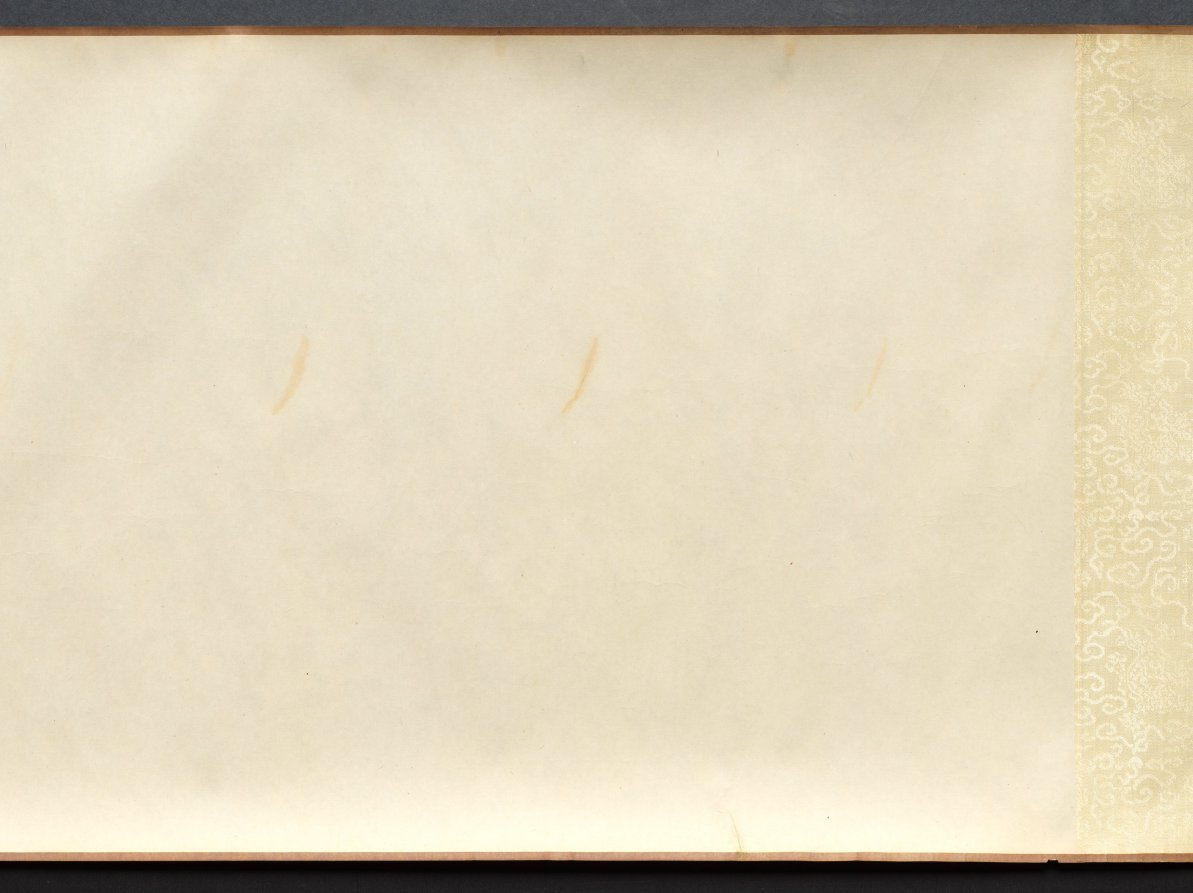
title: Returning to the Village in a Rainstorm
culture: China, Ming dynasty (1368–1644)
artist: Xie Shichen (Chinese, 1487–after 1567)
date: 1530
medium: Handscroll; ink and light color on silk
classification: Painting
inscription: 風雨歸村圖 嘉靖庚寅秋日樗仙謝時臣. [印] 謝時臣印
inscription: 3 additional seals unidentified.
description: This scroll depicts a wind- and rainswept landscape with figures in the countryside struggling against a late summer monsoon rainstorm. Such weather was familiar to residents of the lower Yangzi delta. Xie Shichen spent most of his life in the Suzhou area. Details of his career are scant, but his surviving works suggest that he made his living as a professional painter. This painting conveys drama and anecdotal observations, characteristic of Zhe school paintings, such as the one by Lü Wenying, CMA 1970.76.